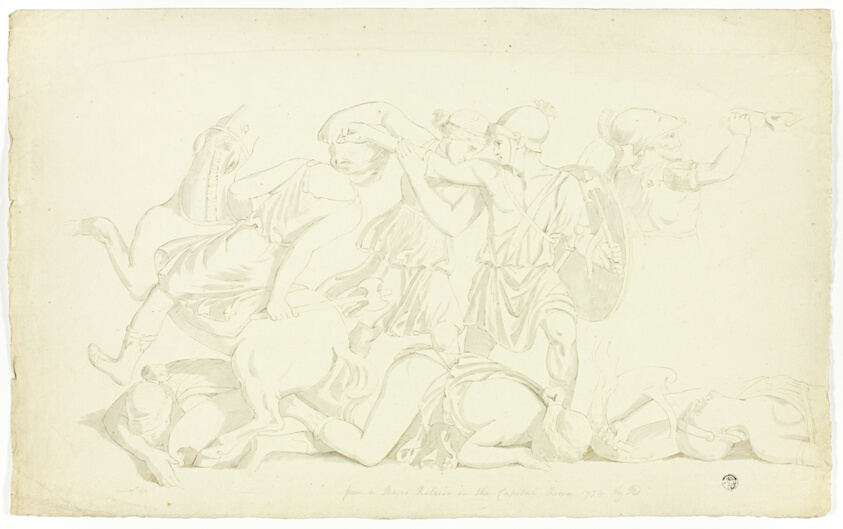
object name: Drawing and Watercolor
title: Ancient Bas-Relief with Battle of the Amazons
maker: John Downman (English, 1750-1824)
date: 1774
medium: Pen and brown ink and brush and gray wash on ivory laid paper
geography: England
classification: pen and ink drawings; drawings (visual works); prints and drawing; paper; brush and wash